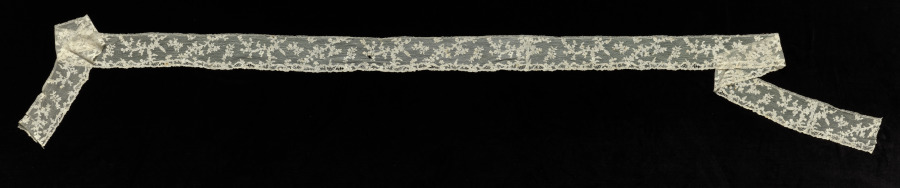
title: Lace Edging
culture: Italy, Burano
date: 1740–60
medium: Linen: needle lace (Burano Point)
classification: Lace